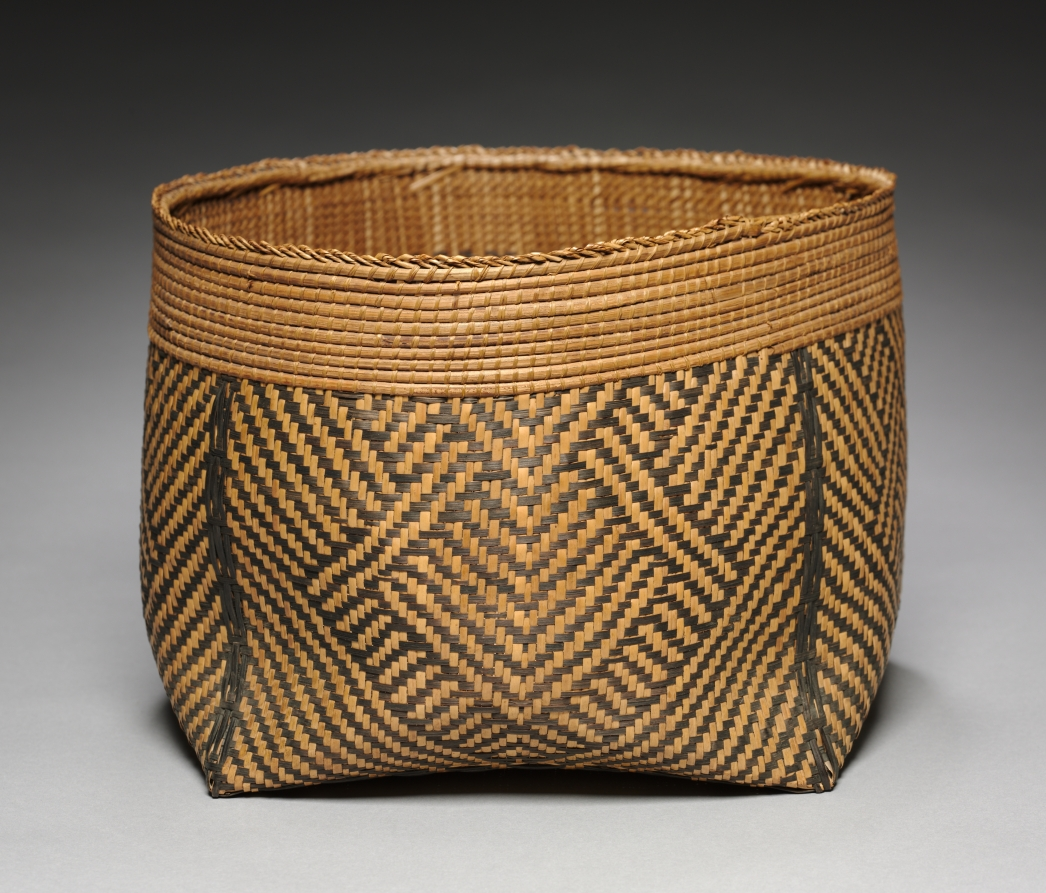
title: Basket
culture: Africa, Central Africa, Democratic Republic of the Congo, Mangbetu-style maker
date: by 1928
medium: Plant fibers and dye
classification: Basketry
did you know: This woven hat looks brand new because it was one of the many items the business-savvy chief of Ekibondo had artists and artisans make for the foreigners who passed through his village.